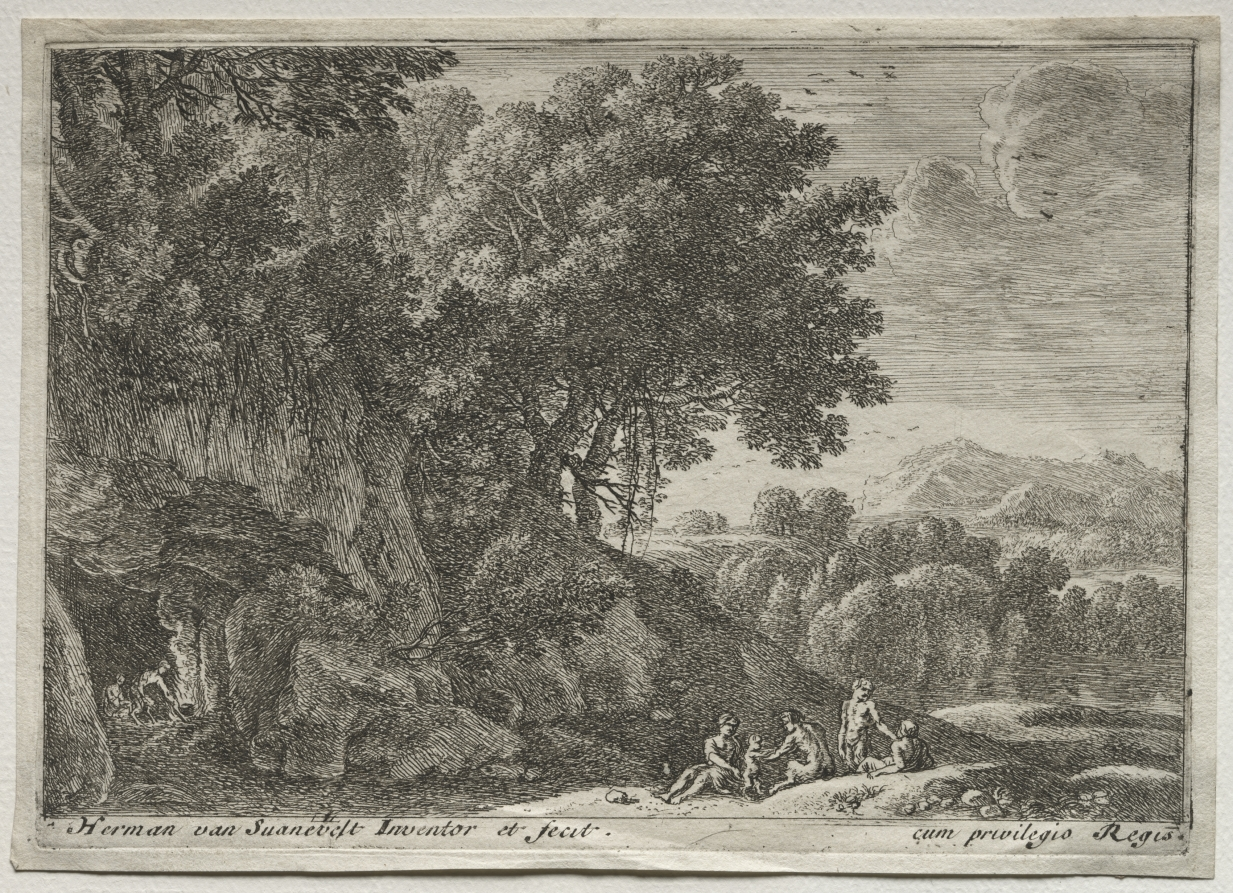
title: Landscape with Satyrs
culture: Netherlands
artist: Herman van Swanevelt (Dutch, c. 1600–1655)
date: 1623–55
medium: etching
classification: Print